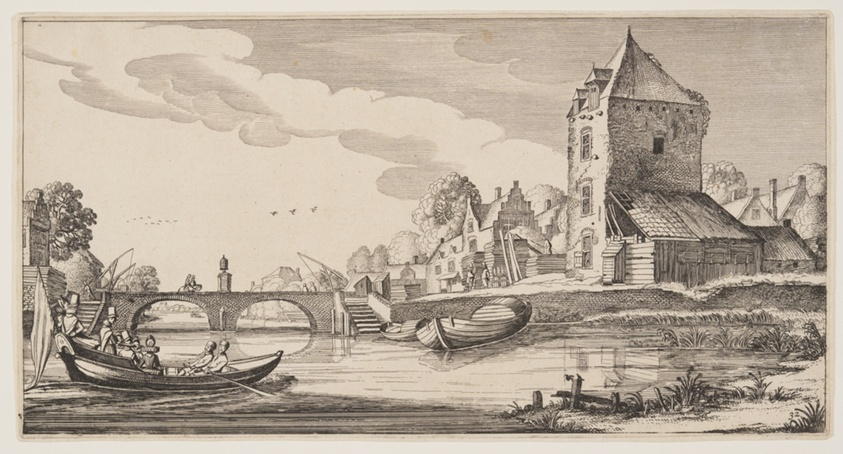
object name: Print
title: Village on a River, from Landscapes (Playsante Lantschappen)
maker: Attributed to Claes Jansz. Visscher II (Dutch, 1586-1652); after Jan van de Velde II (Dutch, c. 1593-1641)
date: c. 1641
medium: Etching, with engraving, on ivory laid paper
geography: Netherlands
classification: etching; paper; print; prints and drawing